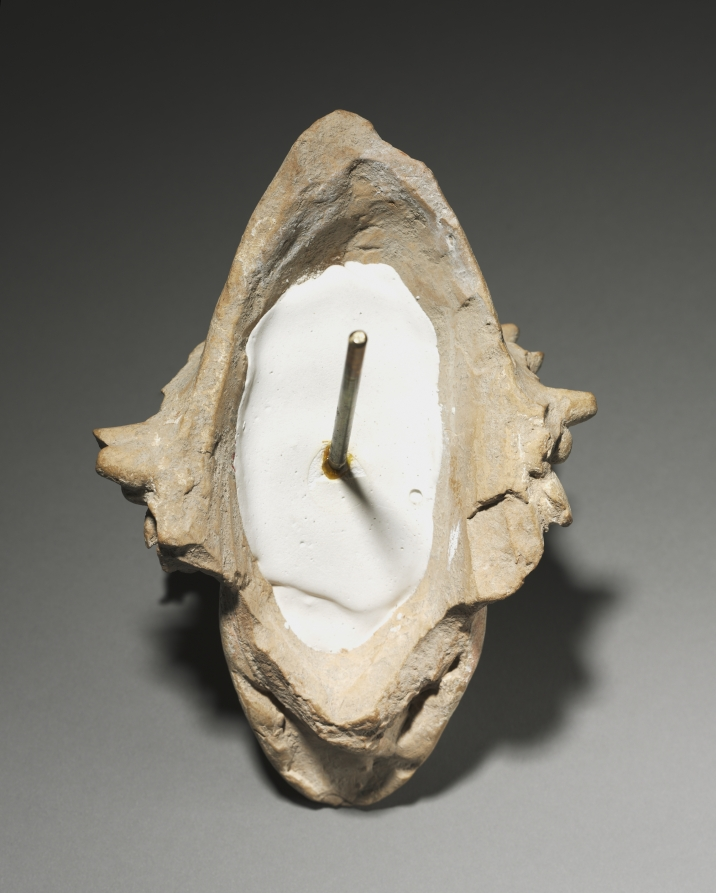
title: Head of Bearded Banqueter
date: 525–500 BCE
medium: terracotta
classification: Sculpture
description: This terracotta head of a man features wide, almond-shaped eyes and a serene smile beneath a long mustache. The man has a long beard and wears a wreath with leaves protruding above and below a string of fruit or beads. His head is covered by a pointed cap. This fragment probably belonged to a figure of a banqueter, or perhaps even Dionysos, the god of wine.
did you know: Wreaths were often worn during Greek symposia (banquets).